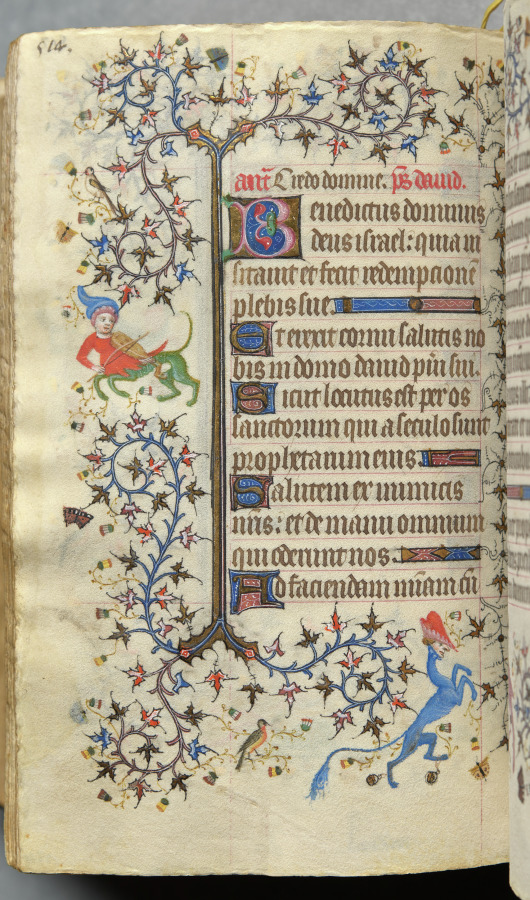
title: Hours of Charles the Noble, King of Navarre (1361-1425): fol. 251v, Text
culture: France, Paris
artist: Master of the Brussels Initials and Associates (French)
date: c. 1405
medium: ink, tempera, and gold on vellum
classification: Bound Volume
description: This precious volume was obviously highly prized by its owner, the French-born King of Navarre, who had his coat of arms painted on no less than twenty folios. Rather than directly commissioning this manuscript from a specific workshop, it seems that Charles the Noble acquired his book of hours -- perhaps ready-made for the luxury market -- while on a trip to Paris in 1404-05. A collaborative effort, six painting styles are evidenced within the pages of this codex, those of two Italians, two Frenchmen, and two Netherlanders. The painter who was responsible for the planning and decoration of the book, and who produced seventeen of the large miniatures, was a Bolognese artist known as the Master of the Brussels Initials. His principal assistant, responsible for most of the borders, was a Florentine who signed his name "Zecho" da Firenze on folio 208 verso.